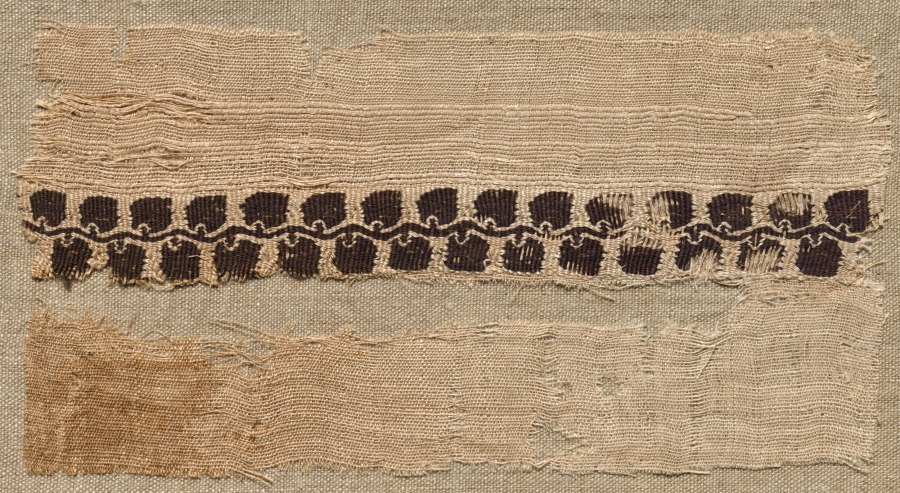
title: Fragment, with Part of a Clavus, from a Tunic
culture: Egypt, Byzantine period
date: 400s - 600s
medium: tabby weave, inwoven tapestry ornament; wool and linen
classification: Textile